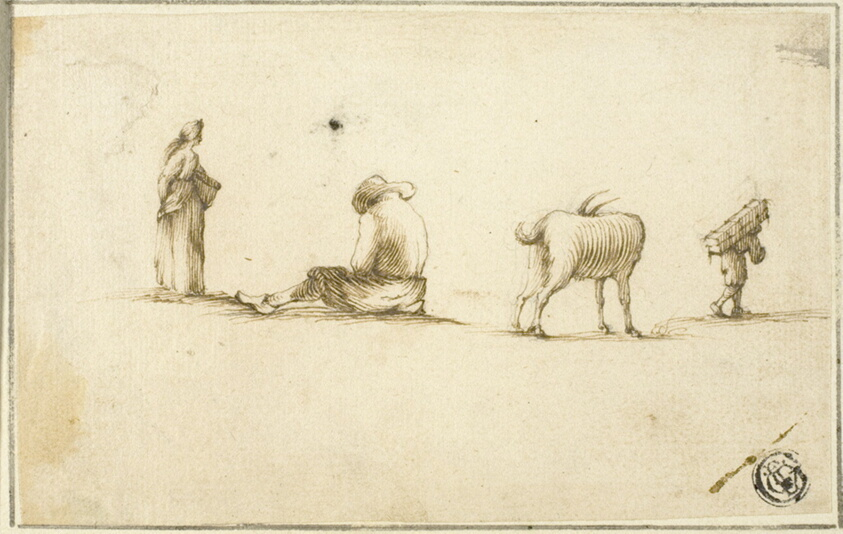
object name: Drawing and Watercolor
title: Sketches of Standing Woman, Seated Man, Goat, and Man Carrying Box on Back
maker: After Stefano della Bella; Italian, 1610-1664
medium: Pen and brown ink, over touches of graphite, on buff laid paper, laid down on cream laid paper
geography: Italy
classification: pen and ink drawings; drawings (visual works); prints and drawing